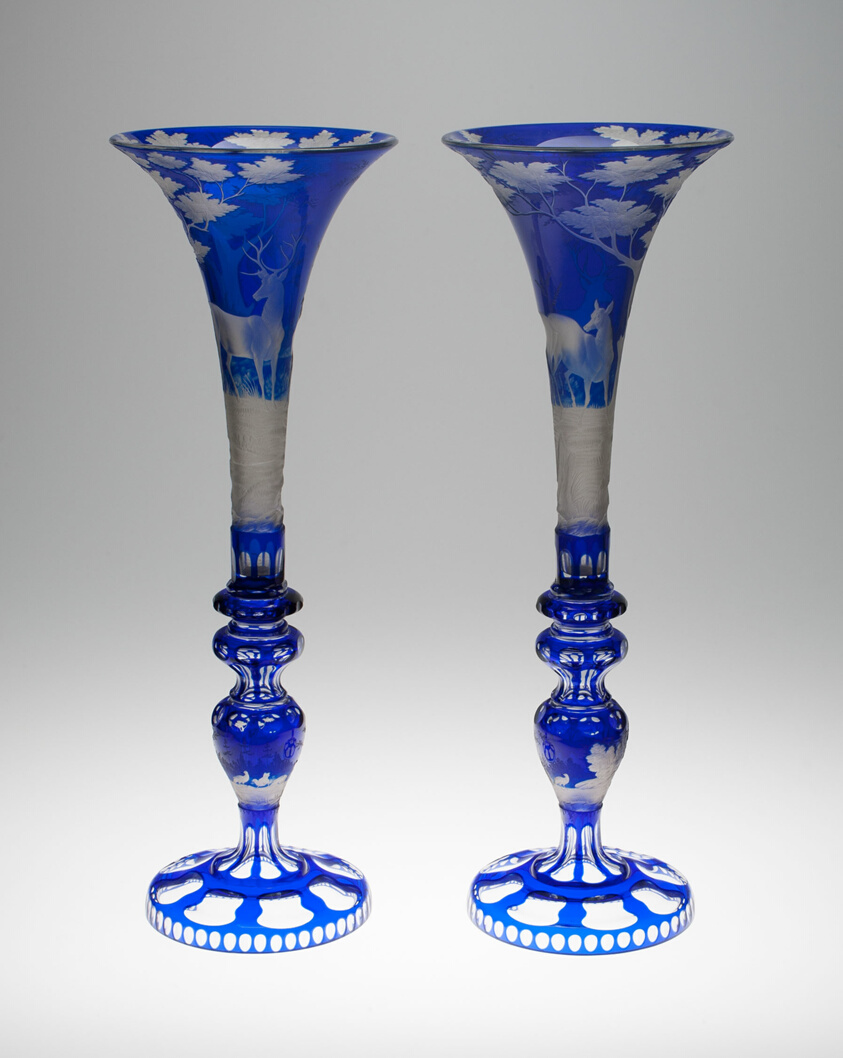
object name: Glass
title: Two Vases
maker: Bohemia, Czech Republic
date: Mid 19th century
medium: Glass; cut with blue overlay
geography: Bohemia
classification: vase; glass; vessel; european decorative arts